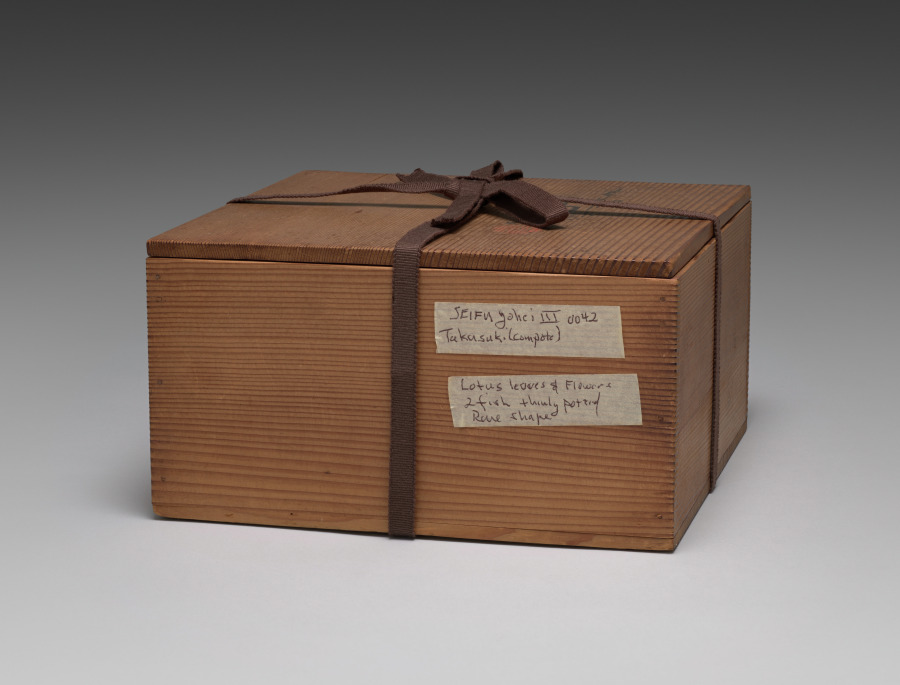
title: High-Footed Bowl with Lotus Pond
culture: Japan, Meiji period (1868–1912)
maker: Seifū Yohei III (Japanese, 1851–1914)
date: 1887–92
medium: Porcelain with underglaze color and modeled designs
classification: Ceramic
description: Seifū Yohei III was the most prominent head of a ceramics studio in Kyoto that specialized in Chinese-style porcelains and especially items for use in sencha (煎茶), or the drinking of steeped-leaf tea with companions. Sencha was popular among the bunjin of Kyoto and Osaka, who often enjoyed it as part of their emulation of Chinese culture. While sencha was by design less formal than the Japanese tea ceremony, it still featured the display of treasured objects. Prized Chinese antiquities were generally unobtainable, so substitutes such as the Gu-Shaped Flower Vase, CMA 2022.224, were much in demand. Bowls for distributing sweets, like this one, were also a staple of sencha gatherings.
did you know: This high-footed bowl simulates exploration of a pond both from underwater and from the sky.